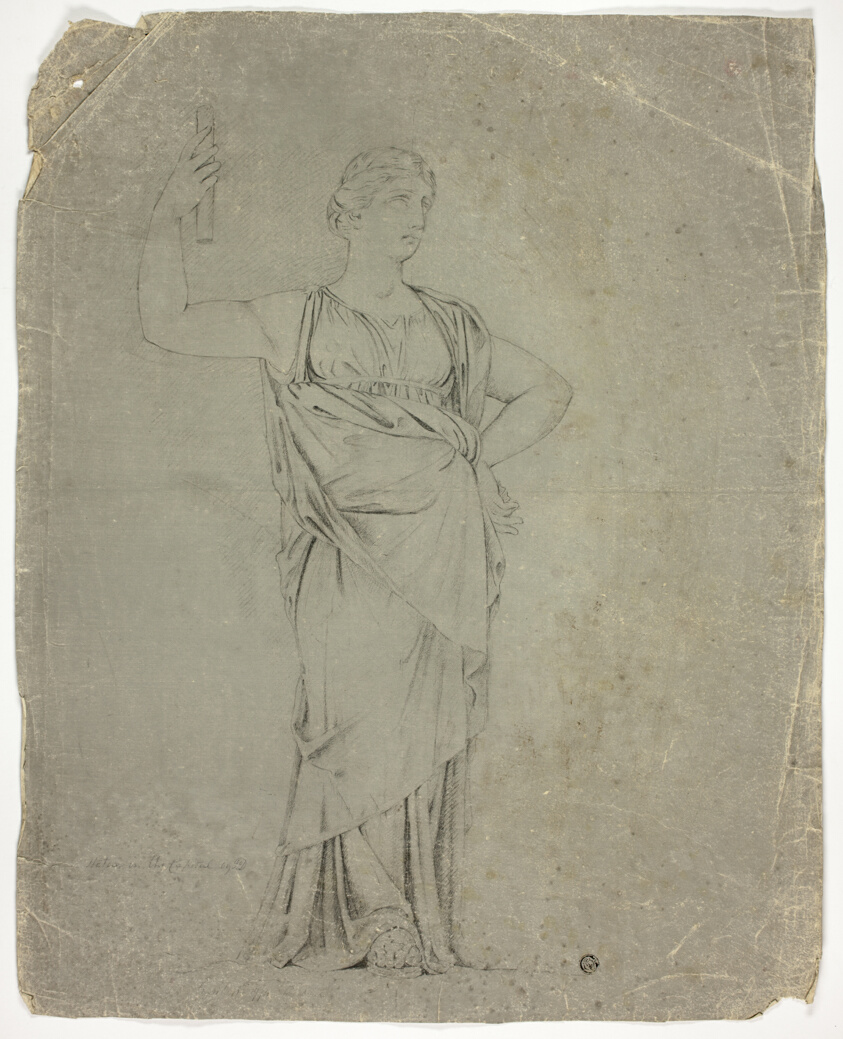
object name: Drawing and Watercolor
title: Ancient Statue of Standing Female Figure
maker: John Downman (English, 1750-1824)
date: c. 1775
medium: Graphite on ivory wove paper prepared with a gray ground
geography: England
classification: chalk; drawings (visual works); prints and drawing; paper